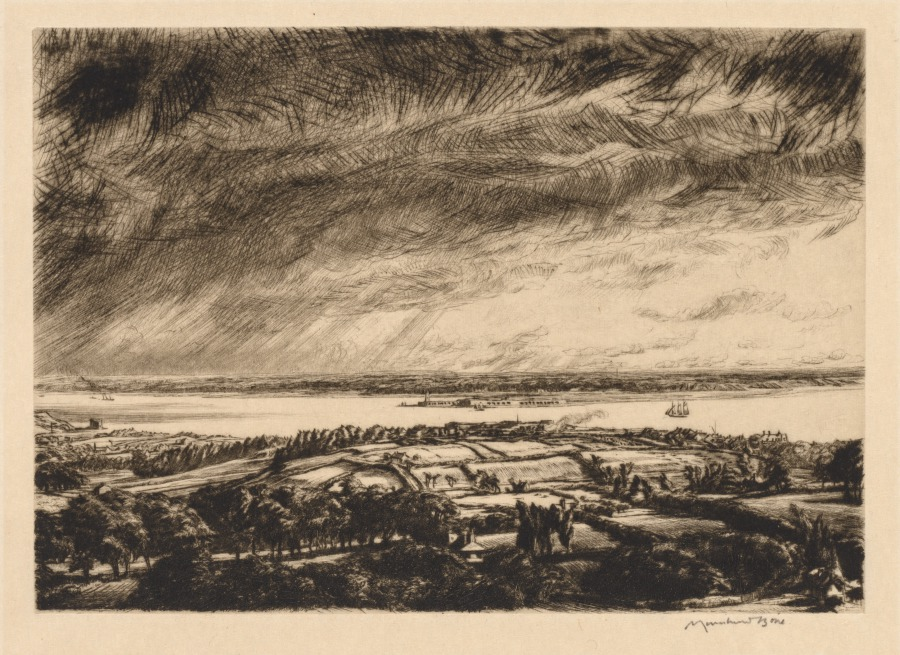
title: The Solent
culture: Britain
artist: Muirhead Bone (British, 1876–1953)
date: 1920–21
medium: drypoint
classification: Print